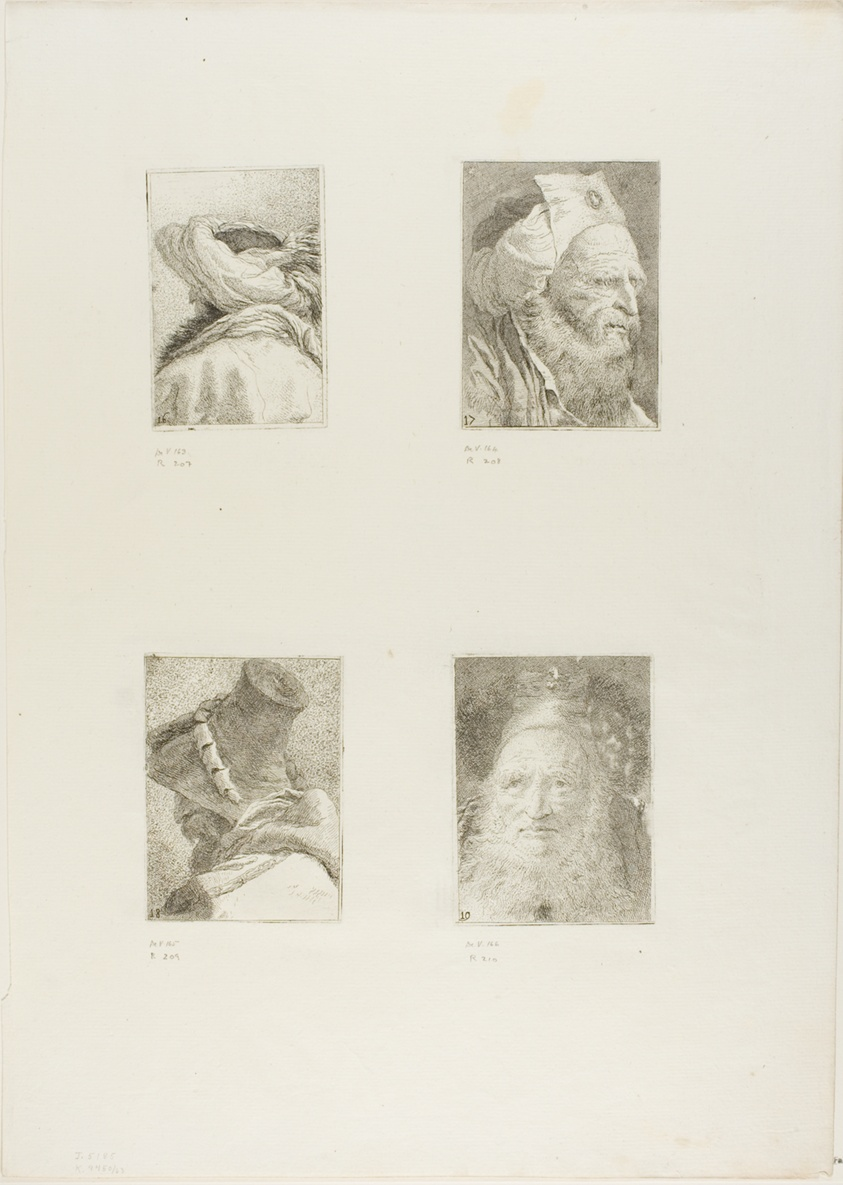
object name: Print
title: Turk Seen from Behind, Three-Quarter View of an Old Man with a Beard, Bearded Old Man with a Hat, Profile of an Old Man with a Hat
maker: Giovanni Domenico Tiepolo (Italian, 1727-1804)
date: 1775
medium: Four etchings on ivory laid paper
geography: Italy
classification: etching; print; prints and drawing